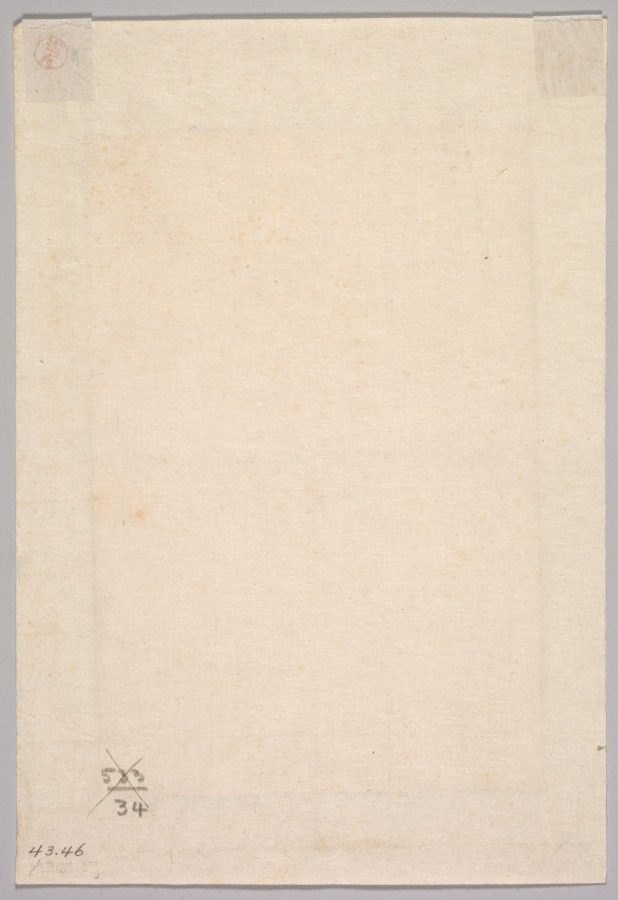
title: Woman Bathing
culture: Japan, Edo period (1615–1868)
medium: color woodblock print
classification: Print